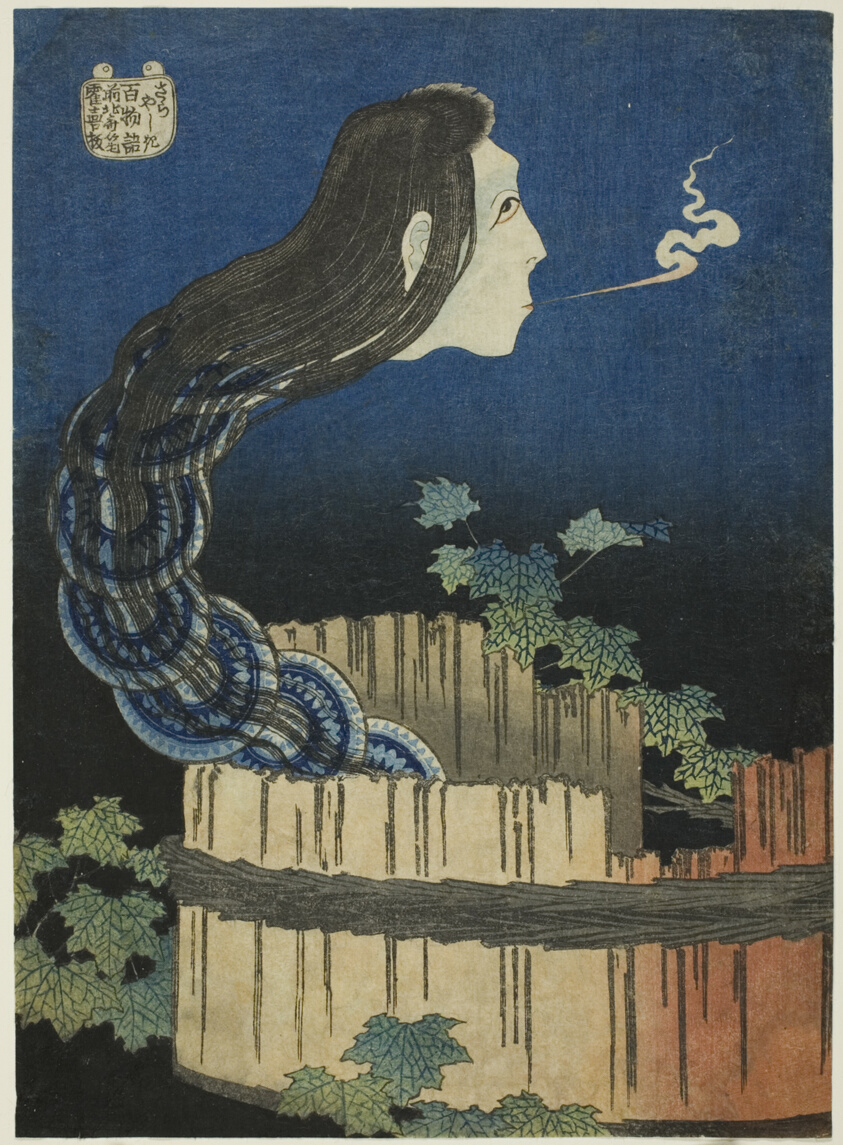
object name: Print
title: The Mansion of the Plates (Sara yashiki), from the series "One Hundred Ghost Tales (Hyaku monogatari)"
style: Japanese (culture or style)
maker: Katsushika Hokusai 葛飾 北斎 (Japanese, 1760-1849)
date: 1831-32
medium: Color woodblock print; chuban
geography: Japan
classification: woodblock print; print; asian art